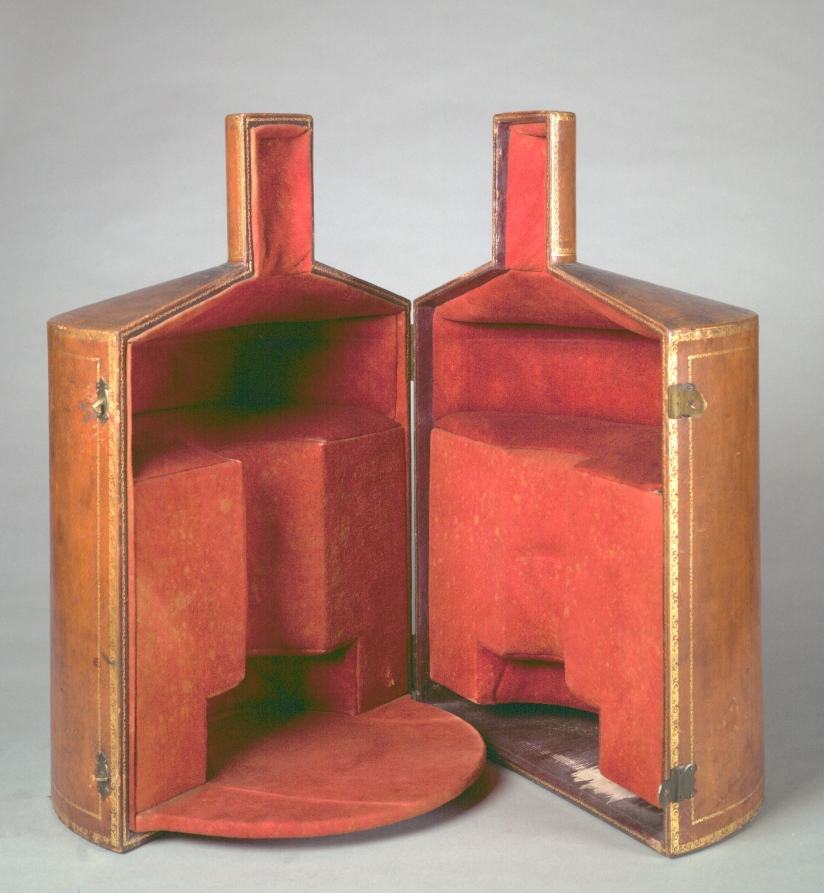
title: Standing Cup and Cover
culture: France, Sèvres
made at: Sèvres Porcelain Factory (French, est. 1756)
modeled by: Hyacinthe-Jean Regnier (French, 1803–1870)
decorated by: Francois-Hubert Barbin (French, 1786-)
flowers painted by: Jacques-Nicolas Sinsson (French)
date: 1844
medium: porcelain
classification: Ceramic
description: The official French porcelain factory at Sèvres has always been one of Europe's most important ceramic manufacturers, famous for its decorative pieces as well as more utilitarian wares. This vase in the Renaissance style, its design inspired by 16th-century French examples, is clearly in the tradition of elaborately conceived and decorated pieces intended for use by the French court or as presentation pieces by its monarchs. The latter was the fate of this Covered Cup, acquired in 1846 by Queen Marie-Amélie d'Orleans, the wife of Louis-Philippe, king during the July Monarchy (1830-48). Soon thereafter the vase was presented to a now unknown person. It is one of four pieces of this design made at the Sèvres factory, and the only one known today to have survived.